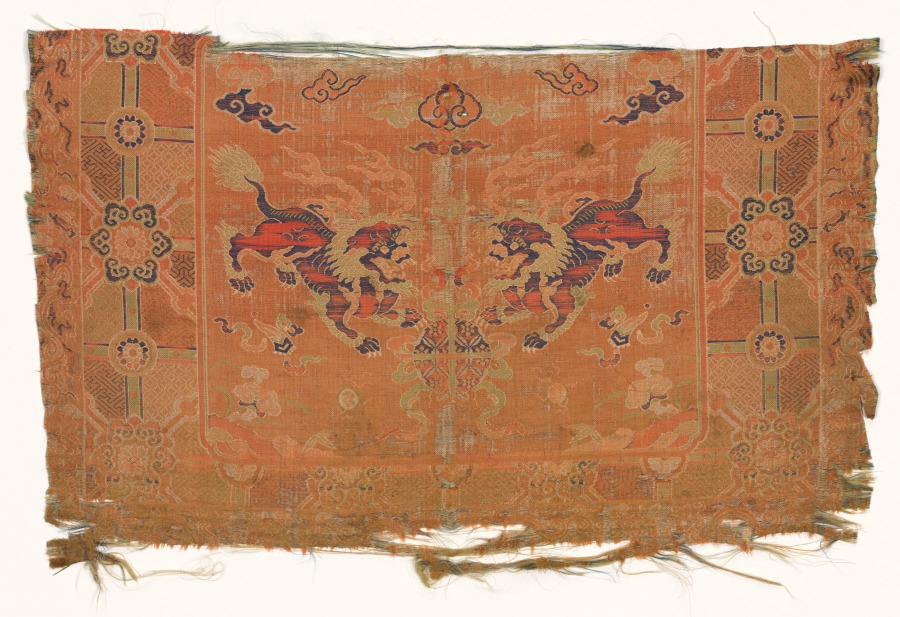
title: Fragment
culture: China, Qing dynasty (1644-1911)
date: 1700–1720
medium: Silk, diaper weave; twill ground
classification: Textile